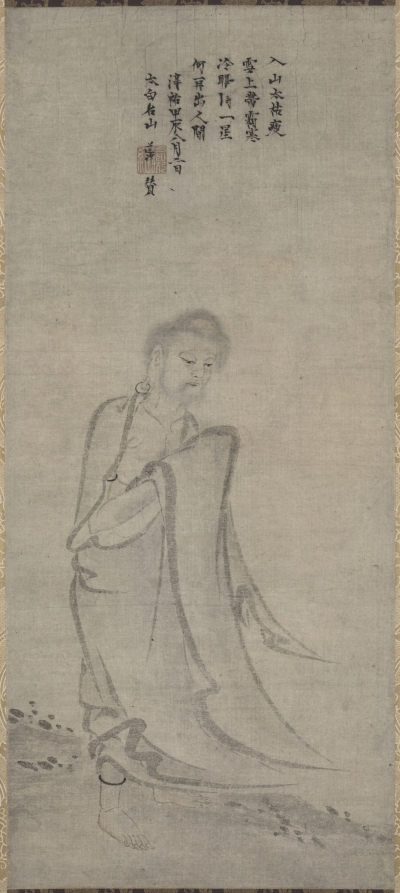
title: Shakyamuni Emerging from the Mountains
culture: China, Southern Song dynasty (1127-1279)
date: 1244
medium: hanging scroll; ink on paper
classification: Painting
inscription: 入山太枯瘦，雪上帶霜寒。 冷眼得一星，何再出人間。 淳祐甲辰八月二日 太白名山 道冲 贊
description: Shakyamuni emerged from the mountains after years of ascetic practices, which anticipated his sermon in Deer Park and attainment of enlightenment under the bodhi tree. However, this figure of Shakyamuni can be interpreted as having already achieved enlightenment and reentered the earthly world to spread the dharma (Buddhist law). Chijue Daoching’s inscription mentions his indifferent glance at the morning star, suggesting nonattachment: Entering the mountains he was much too thin and withered. The snow is overlaid with frost—it is cold. Casting an indifferent glance, he saw a [morning] star. Why should he once again emerge among the world of men.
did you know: The painting was inscribed by the abbot of Jingde Temple 景德寺 of Mount Tiantong 天童山 near Ningbo 寧波.